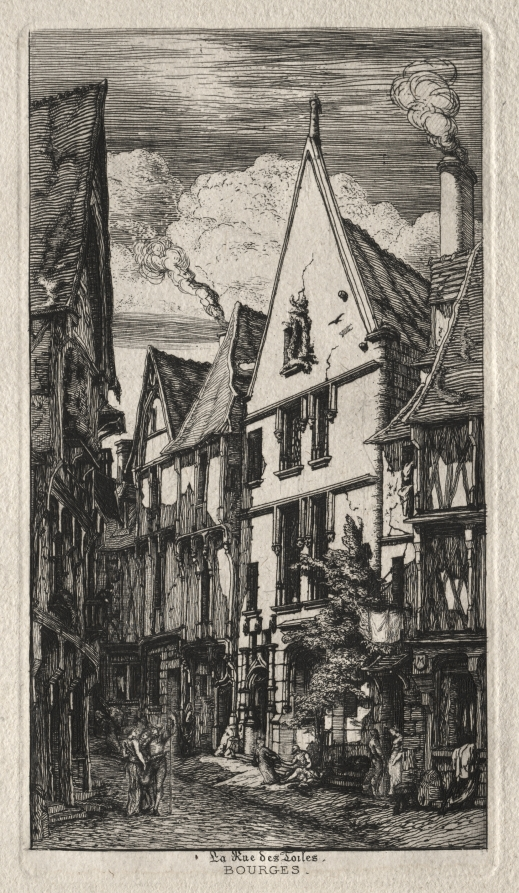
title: Rue des Toiles, Bourges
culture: France, 19th century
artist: Charles Meryon (French, 1821–1868)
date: 1853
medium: etching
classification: Print